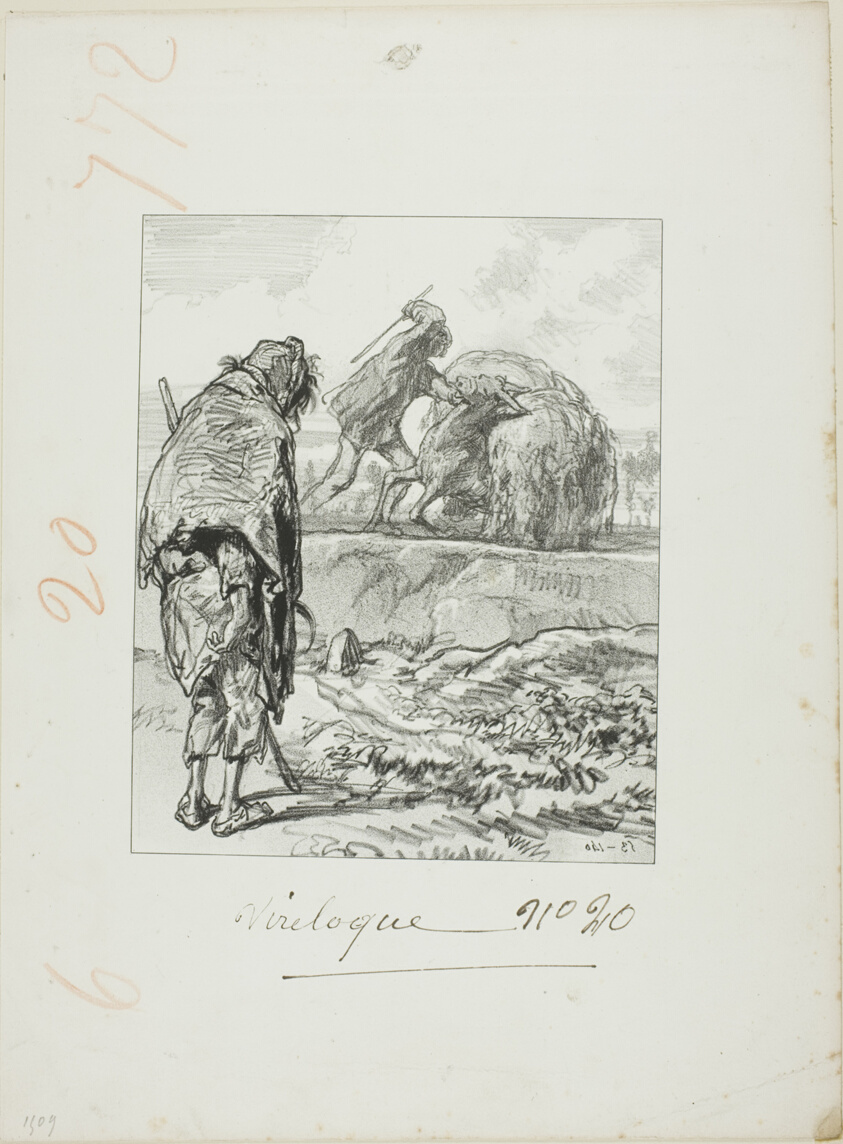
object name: Print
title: Les Propos de Thomas Vireloque: Michael paying wages to his servant (beating him)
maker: Paul Gavarni (French, 1804-1866)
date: 1853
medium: Lithograph in black on cream wove paper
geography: France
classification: lithograph; print; prints and drawing